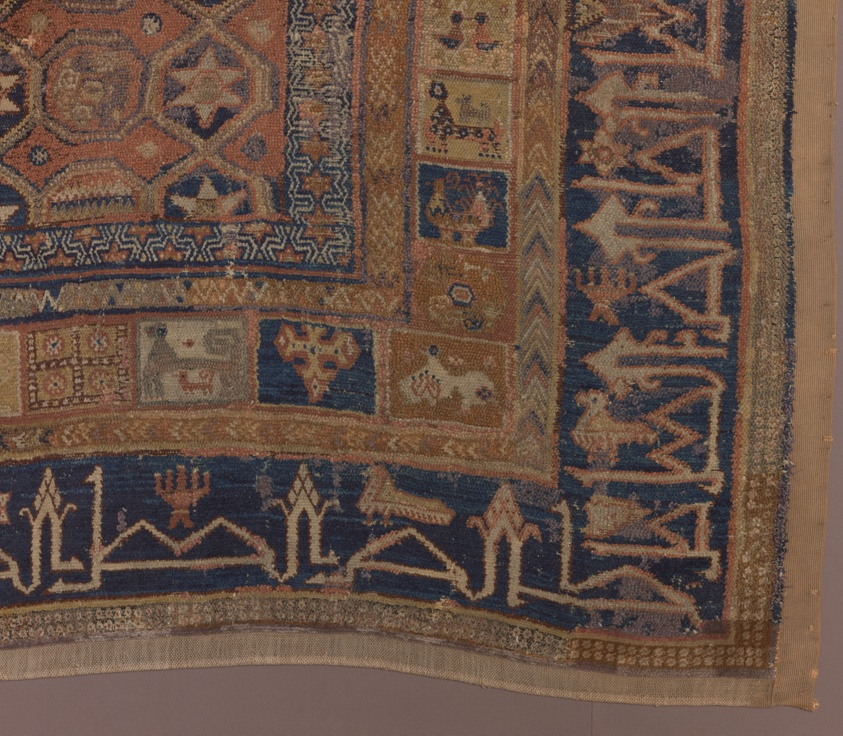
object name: Textile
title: Carpet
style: hispano-moresque, medieval, european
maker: Hispano-Moresque; Spain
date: Before 1473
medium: Wool, plain weave with supplementary wefts forming cut pile through a technique known as "Spanish knots"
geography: Spain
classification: weaving - carpet; textile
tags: geometric motif, abstract figures, animals, birds, cross motif, script, stars